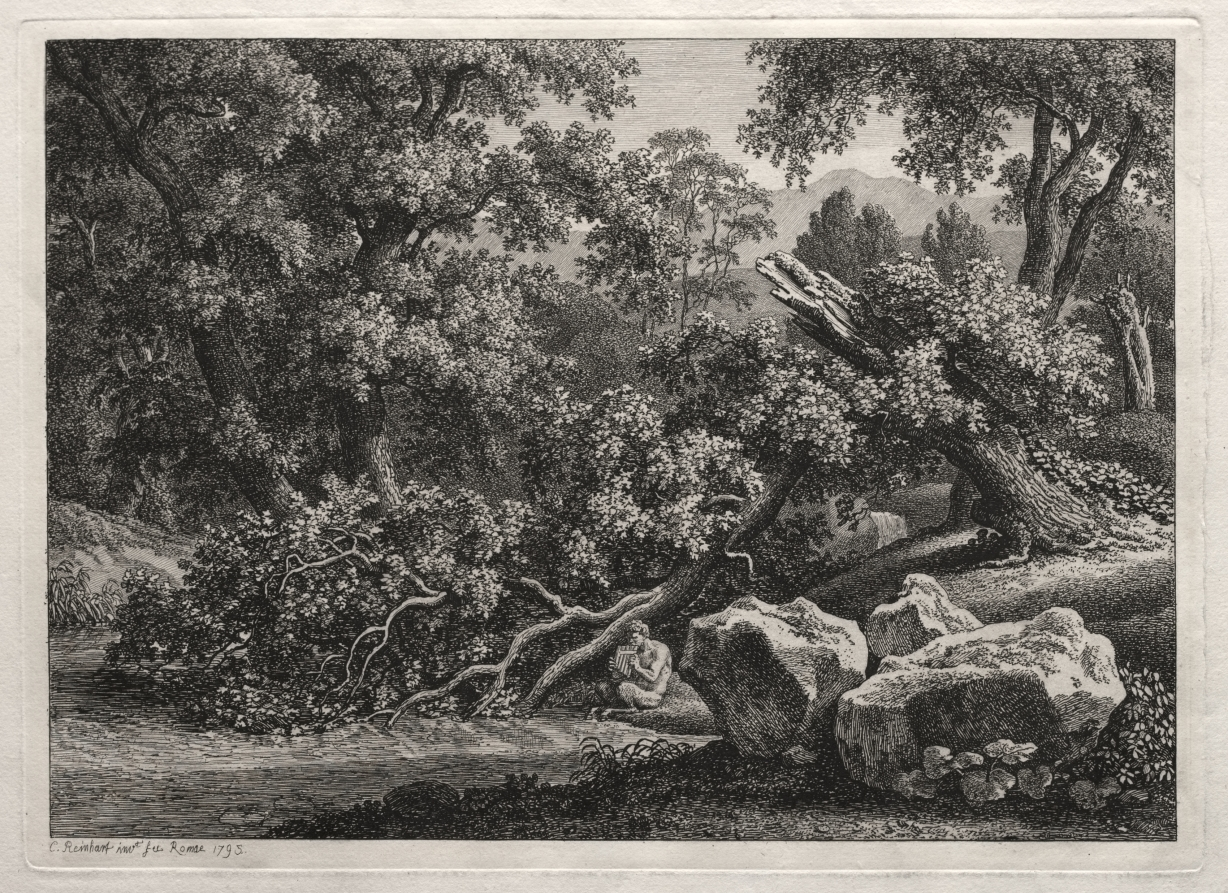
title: Heroic Landscape: The Satyr Playing the Flute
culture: Germany, 19th century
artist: Johann Christian Reinhart (German, 1761–1847)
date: 1795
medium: etching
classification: Print